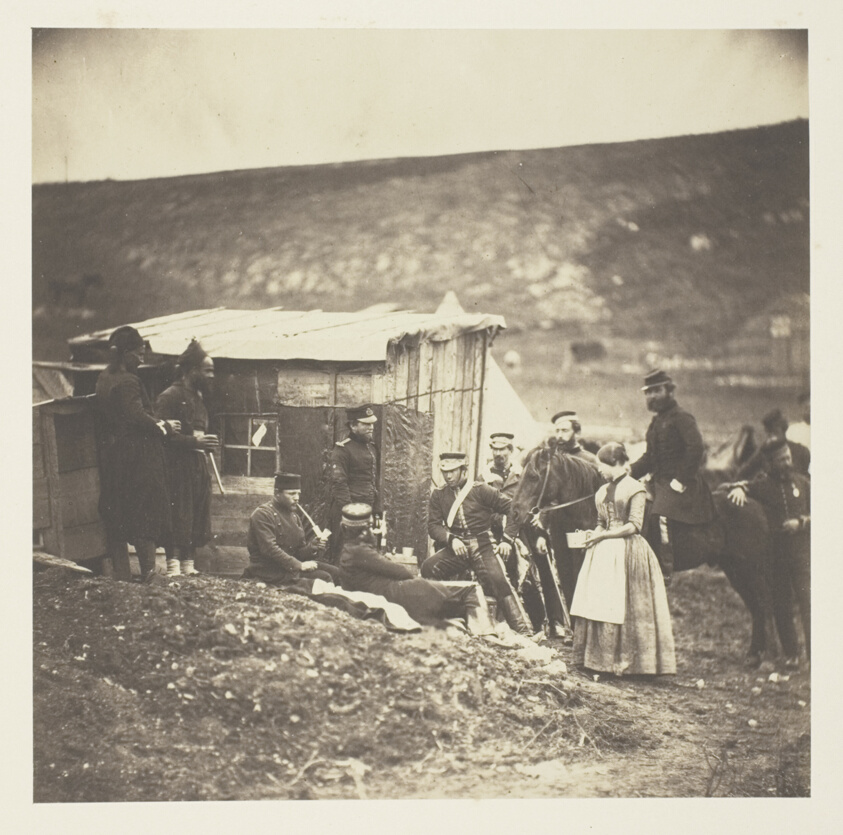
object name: Photograph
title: Camp of the 4th Dragoon Guards, convivial party, French & English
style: 19th century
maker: Roger Fenton (English, 1819–1869)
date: 1855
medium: Salted paper print, plate 26 from the album "Photographs Taken in the Crimea" (1856)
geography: England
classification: salted paper print; photographic process; photography; photograph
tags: Collected by Hugh Edwards, Crimea 1856